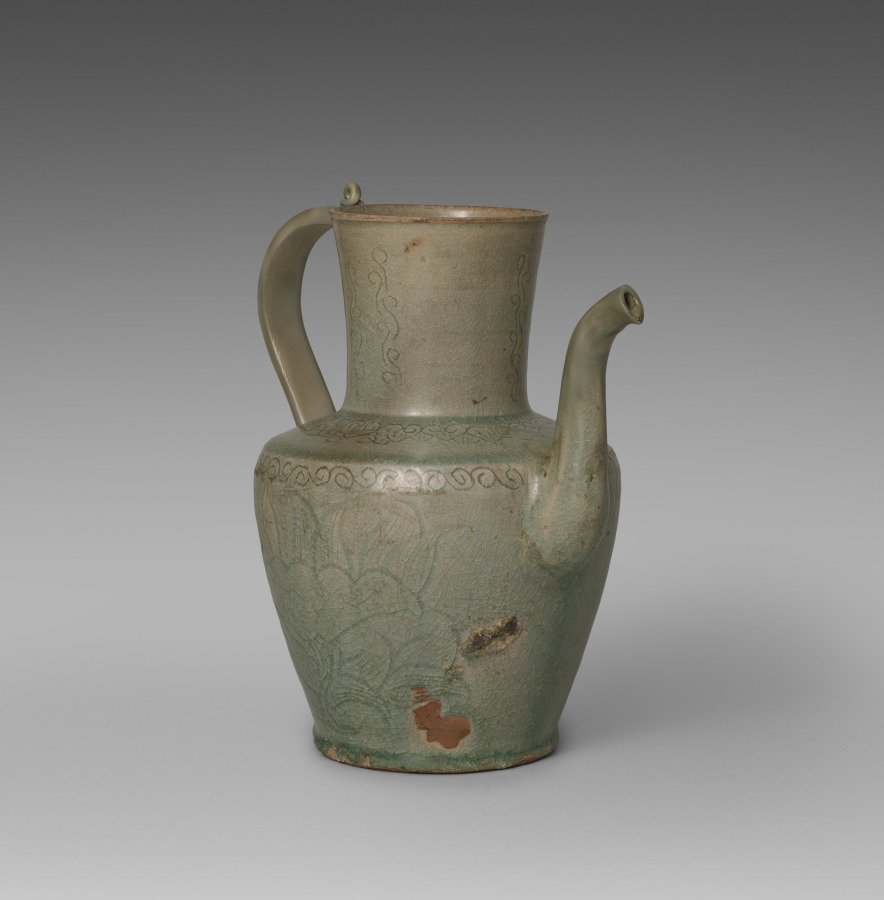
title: Wine Pot with Incised Lotus Design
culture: Korea, Goryeo dynasty (918–1392)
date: 918–1392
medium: celadon ware with incised and carved decoration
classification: Ceramic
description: As early as the seventh century, the practice of drinking tea and wine became an important part of elite culture in Korea. Elites of the Goryeo period commissioned a variety of types of utensils and vessels including this elegant wine pot with the incised image of lotus flowers, not only to make their drinking experience more exciting, but also to show their appreciation of nature.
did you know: A small loop on the handle was intended to secure the lid (now missing) on top of the pitcher through a cord or chain.